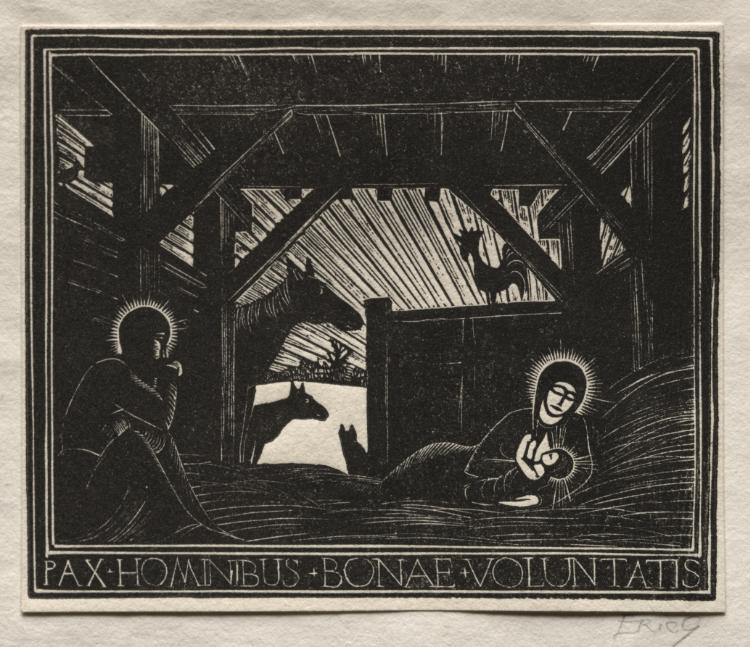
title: Christmas Gifts: Dawn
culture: England, 20th century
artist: Eric Gill (British, 1882–1940)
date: 1916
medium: wood engraving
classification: Print